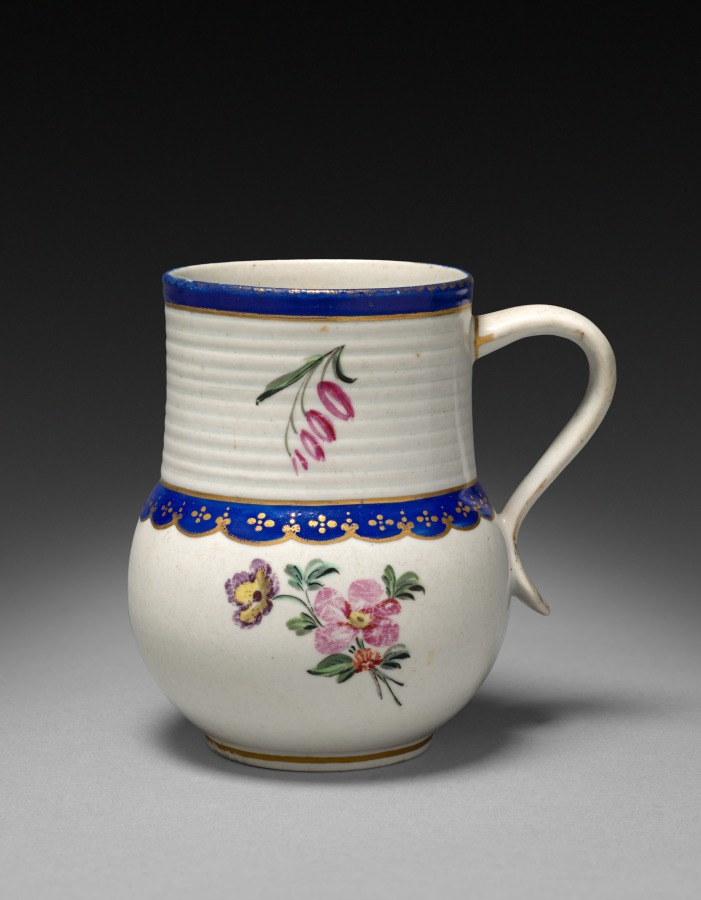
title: Duseberry Cream Pot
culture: England, Derby, 18th century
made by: Derby Porcelain Factory (Chelsea-Derby Period, 1770–84)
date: c. 1770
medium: soft-paste porcelain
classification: Ceramic